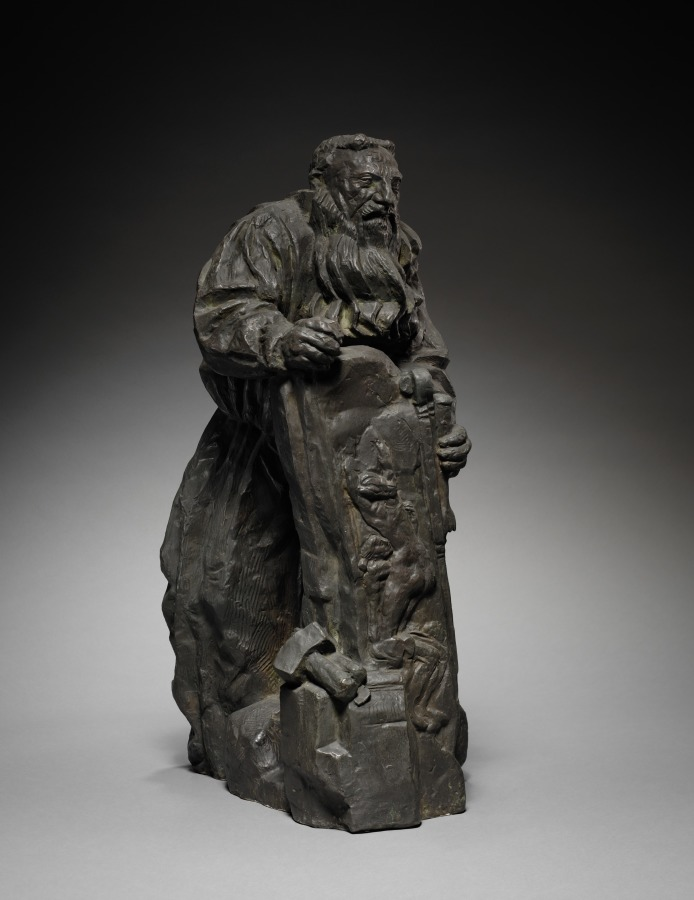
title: Rodin Working on "The Gates of Hell"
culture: France, 20th century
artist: Emile Antoine Bourdelle (French, 1861–1929)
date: 1910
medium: bronze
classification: Sculpture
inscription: Inscribed on side: "Rodin travaillant a la porte de l'enfer"; "Emile-Antoine Bourdelle, 1910"